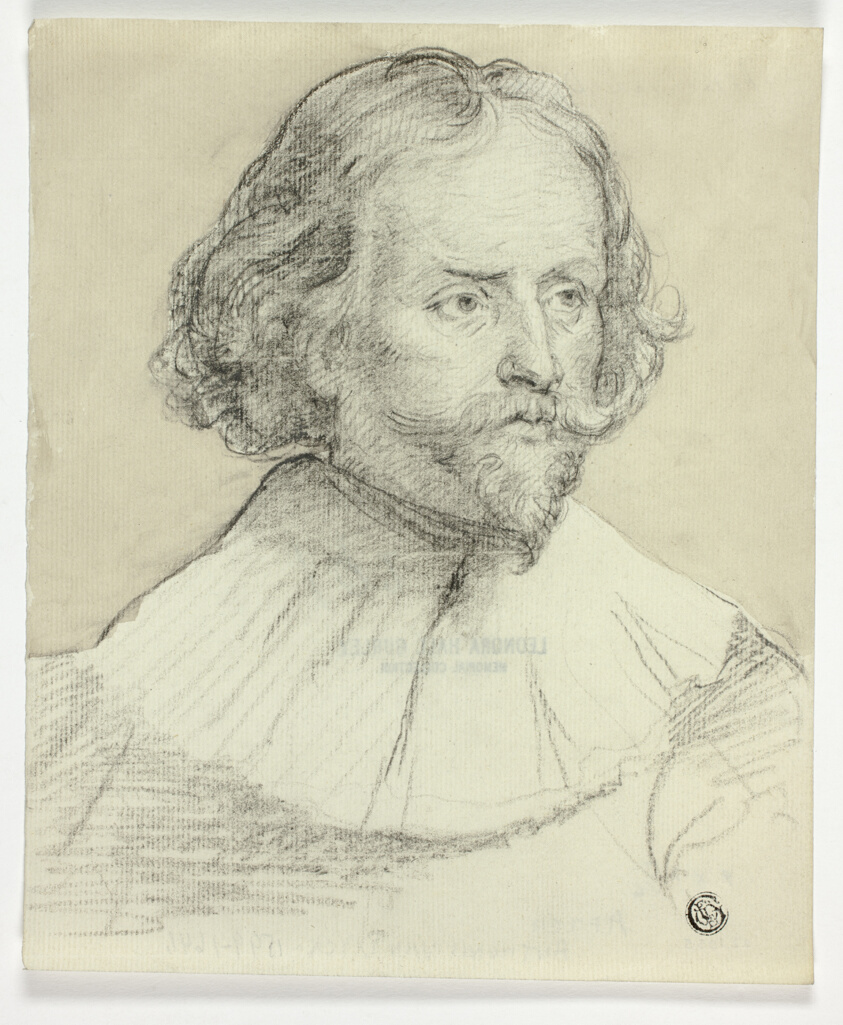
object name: Drawing and Watercolor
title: Quintijn Simons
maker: After Anthony van Dyck; Flemish, 1599-1641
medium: Charcoal, with brush and pale brown wash, on off-white laid paper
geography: Flanders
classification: chalk; drawings (visual works); prints and drawing